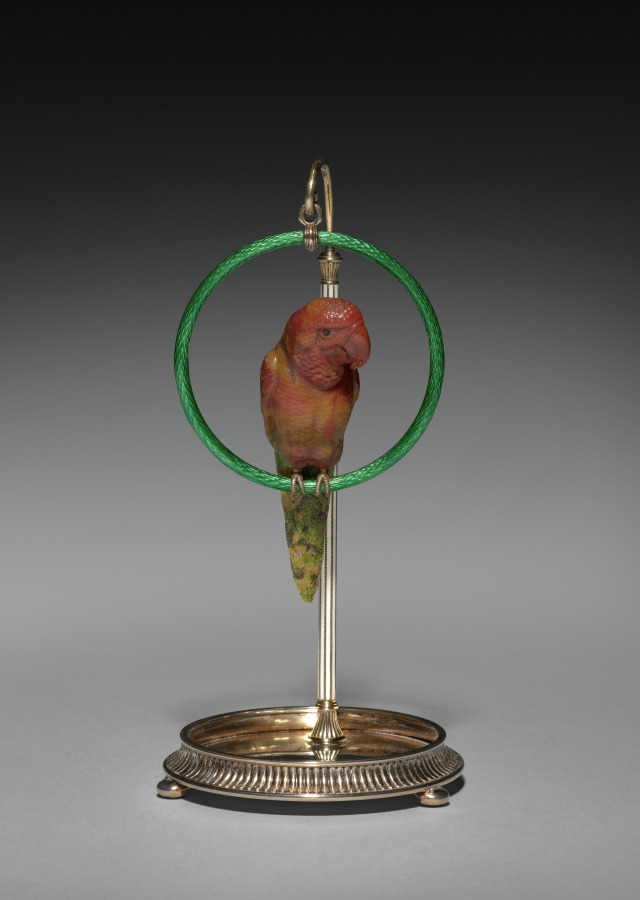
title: Parrot on a Perch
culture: Russia, St. Petersburg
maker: House of Fabergé (Russian, 1842–1918)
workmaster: Mikhail Evlampievich Perkhin (Russian, 1860–1903)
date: 1896–1903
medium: silver, enamel, jasper, agate, emeralds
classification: Miscellaneous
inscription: 88, Kokoshnik, tester's initials (in Cyrillic) [assay mark for St. Petersburg, 1896-1908]; initials of workmaster Mikhail Perkhin (in Cyrillic); Fabergé (in Cyrillic); 6817 scratched.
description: In creating luxurious accessories for a desk or tabletop, Fabergé often used native hardstones such as multicolored agate and jasper, green nephrite, pink rhodonite, and rock crystal found in the Ural Mountains of western Russia. By paying careful attention to the unique colors and textures of the stones, Fabergé and his craftsmen brought them to life, turning milky agate into a begging poodle or green and black jasper into this parrot sitting on a perch. The use of native materials also promoted Russian nationalism, which appealed greatly to the tsar and his family.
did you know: Tsar Nicholas and his cousins in the British royal family kept parrots and parakeets throughout their many palaces.